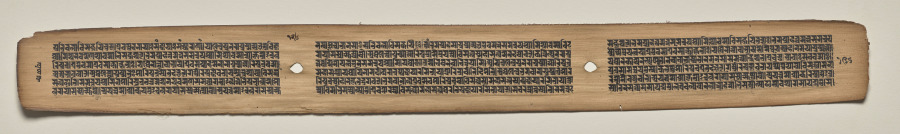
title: Text, Folio 126 (verso), from a Manuscript of the Perfection of Wisdom in Eight Thousand Lines (Ashtasahasrika Prajnaparamita-sutra)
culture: Eastern India, Bihar, Vikramashila Monastery. Painting: Nepal, Kathmandu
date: Sunday, September 14, 1119 (year 239 of the Newar Samvat in the month of Ashvina)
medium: gum tempera and ink on palm leaves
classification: Painting